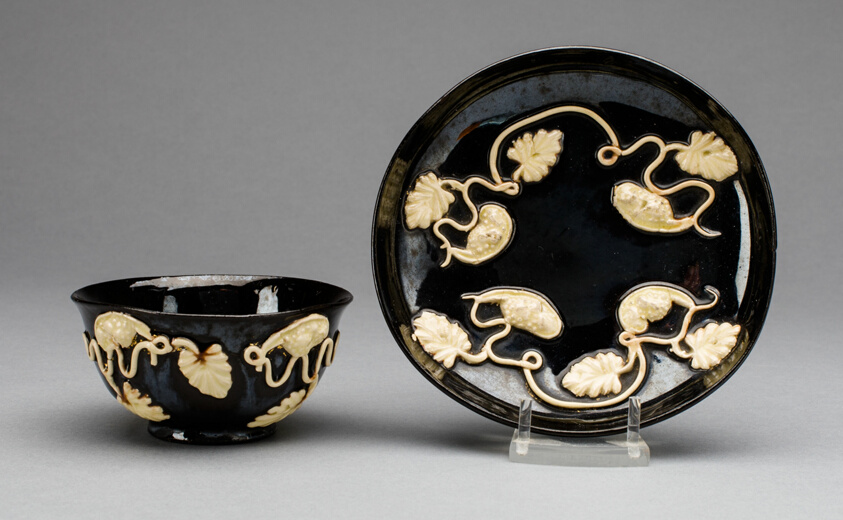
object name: Ceramics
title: Cup and Saucer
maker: Staffordshire, England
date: c. 1750/65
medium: Lead-glazed earthenware (blackware)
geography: Staffordshire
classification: drinking vessel; ceramics; earthenware; lead-glazed earthenware; blackware (black basaltes); european decorative arts